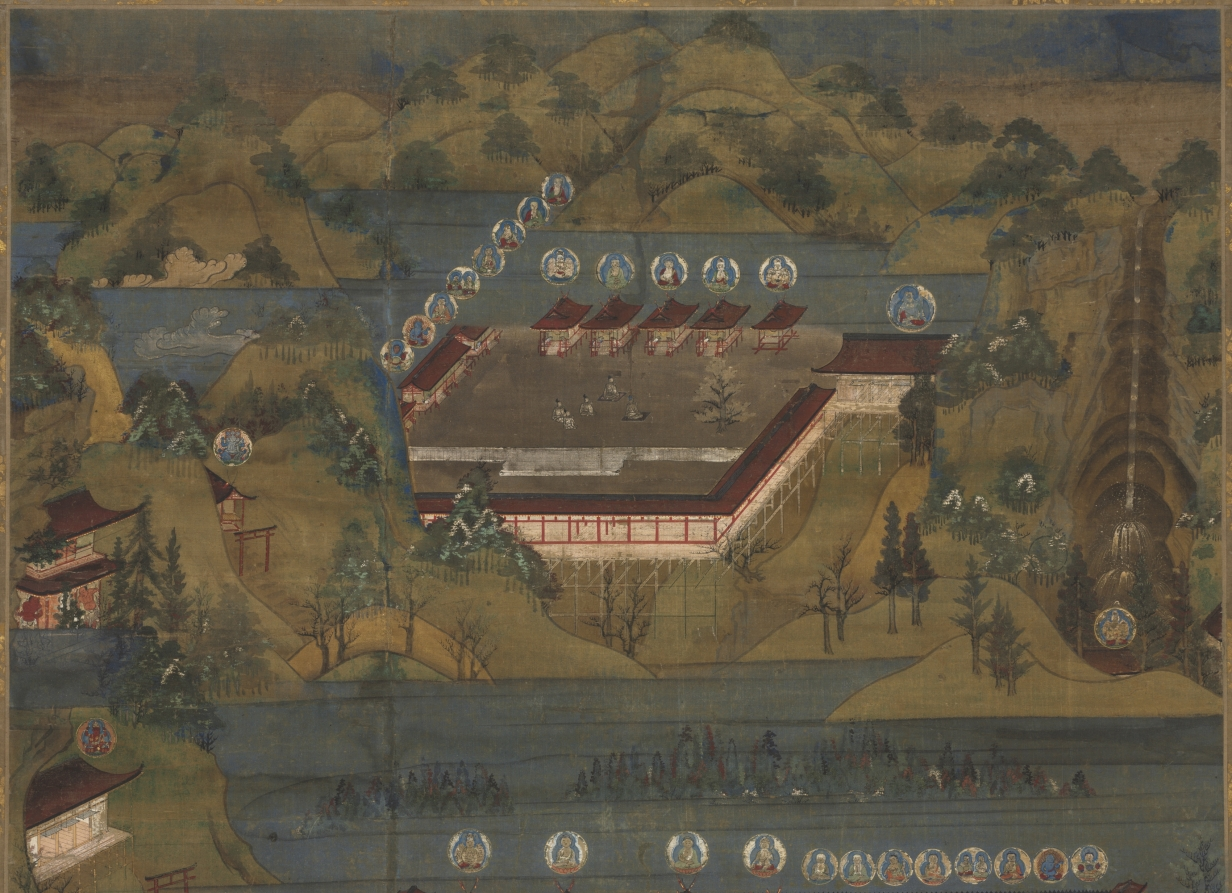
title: Mandala of the Three Shrines at Kumano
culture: Japan, Kamakura period (1185–1333) to Nanbokuchō period (1336–92)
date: 1300s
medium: hanging scroll; ink and color on silk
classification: Painting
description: This painting depicts the three shrines of Kumano from a bird’s-eye perspective, with the Buddhist counterparts of the kami of each shrine hall shown in discs directly above the halls. It also features figures, both pilgrims and deities, along the pilgrimage route and at the shrines. It is the only surviving work illustrating architectural representations of all three shrines in the same painting. They are compressed into a stacked composition, with the Nachi shrine at the top, the Shingū in the middle, and the Hongū at the bottom.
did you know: The sacred waterfall at the top right of the painting is called Nachi.